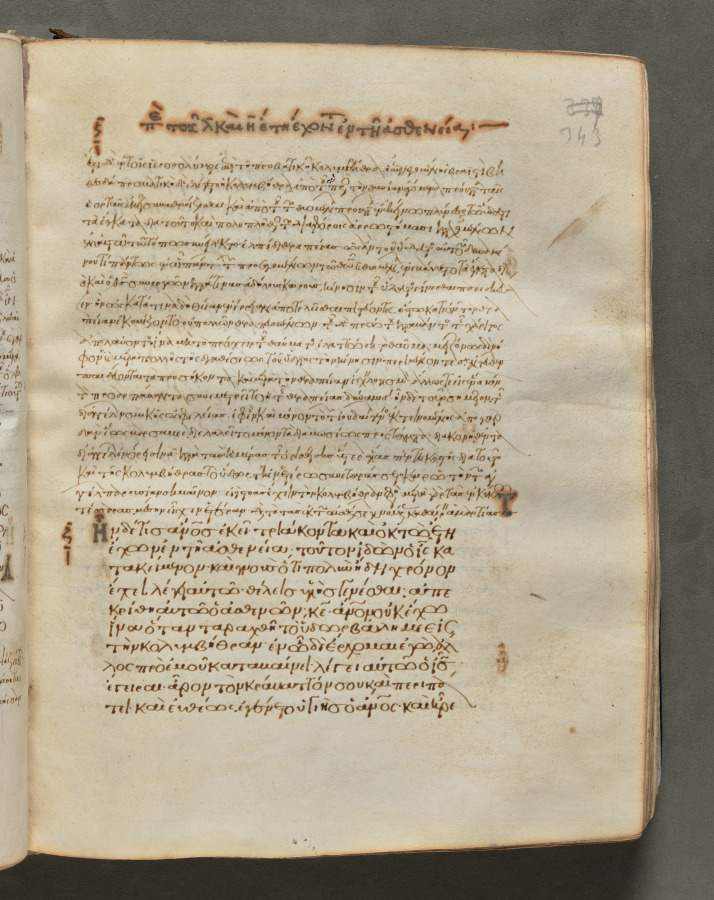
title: Text, folio 343 (recto), from a Gospel Book with Commentaries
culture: Byzantium, Constantinople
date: c. 1000–1100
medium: ink, tempera, and gold on vellum; leather binding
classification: Bound Volume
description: Each of the four gospels in this book opens on a page with brilliantly illuminated borders depicting the author of the text as well as birds—principally peacocks, symbols of the immortality of the soul—and fountains, representing the fountain of life and the salvation of the soul. This volume consists of 428 leaves with texts in Greek. Its level of sophistication suggests that it was probably written and decorated in a monastery in Constantinople.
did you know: Gospel books were carried in procession through Byzantine churches.